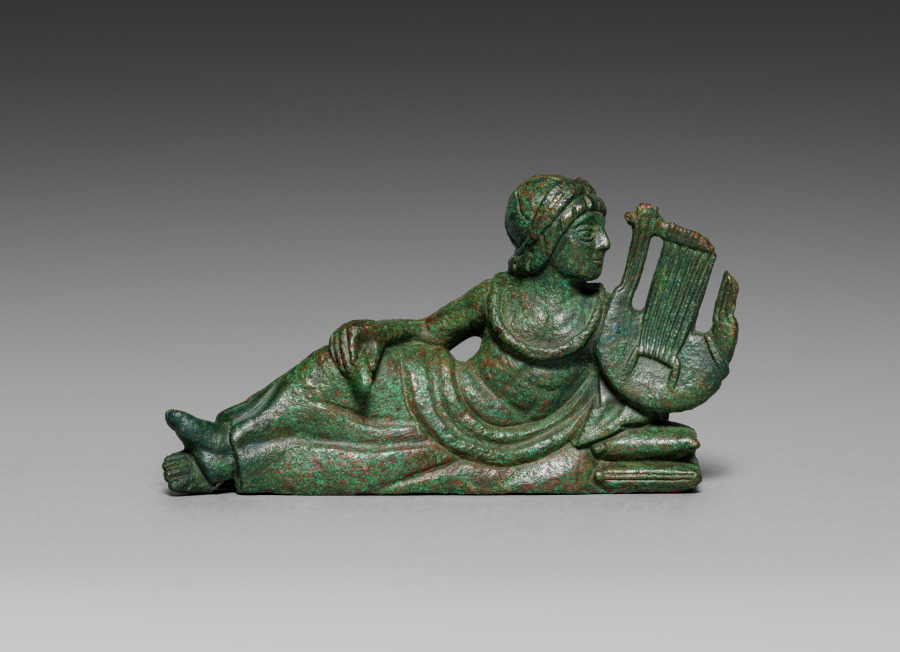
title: Vessel Ornament of Reclining Lyre-player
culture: Etruscan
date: probably 400–375 BCE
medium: bronze with gilding traces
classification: Sculpture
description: This bronze banqueter figurine was one of six once adorning the rim of a large basin, now lost. Cast in molds with individualized details, most have grooves on their underside to attach to the basin. Minute traces of gilding remain on areas of clothing and skin (mostly visible only under magnification), suggesting that they may have been completely gilded. Two handles in the form of hippocampi, horses with serpentine tails, also belonged to the basin and are now displayed at the Michael C. Carlos Museum at Emory University. The basin may have been used to hold liquid for a banquet, or was perhaps funerary. This reclining banqueter holds a lyre in his left hand and an oblong pick in his right hand. His face tilts toward the lyre and garlands hang around his head and chest. Two bare feet emerge from the bottom of the himation in a position distinct from the feet of the other figurines in this group. Some gilding remains on the top edges of the lyre and on the banqueter’s lips and drapery.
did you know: The lyre held by this banqueter bears traces of gilding.